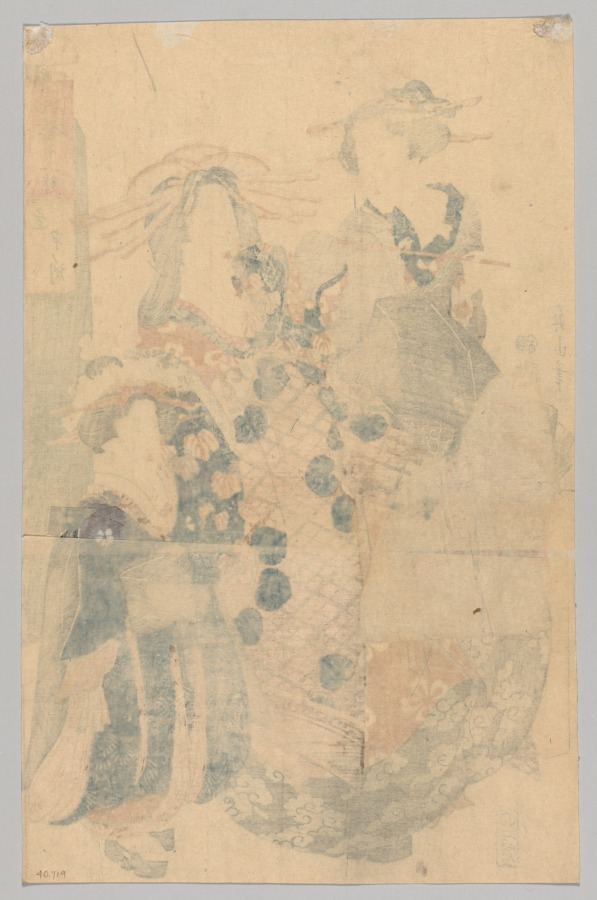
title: Two Women and a Girl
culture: Japan, Edo period (1615–1868)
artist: Kikukawa Eizan (Japanese, 1787–1867)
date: 1800–1829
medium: color woodblock print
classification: Print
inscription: Signature: Yeizan